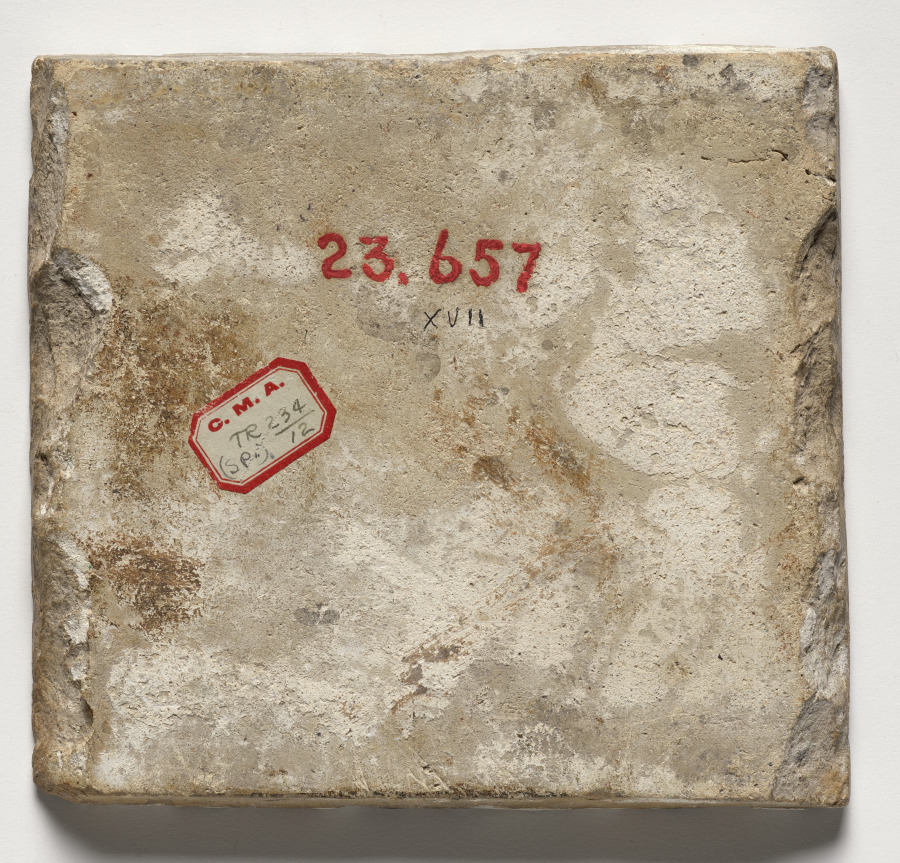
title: Wall Tile–Knight on Horseback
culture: Spain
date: c. 1600s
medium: glazed ceramic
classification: Ceramic